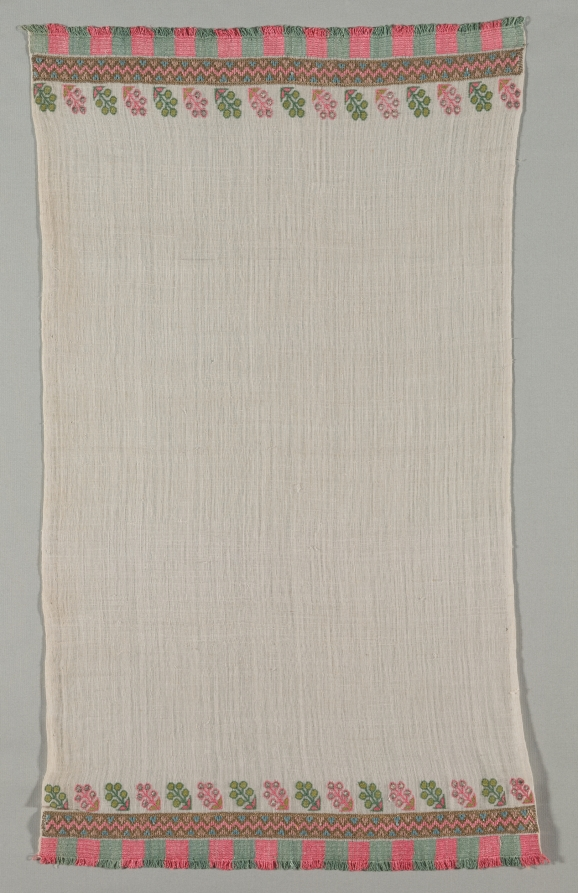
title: Embroidered Towel (Peshkir)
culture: Turkey, 19th century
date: 19th century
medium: embroidery: silk, gold and silver filé on linen tabby ground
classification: Embroidery